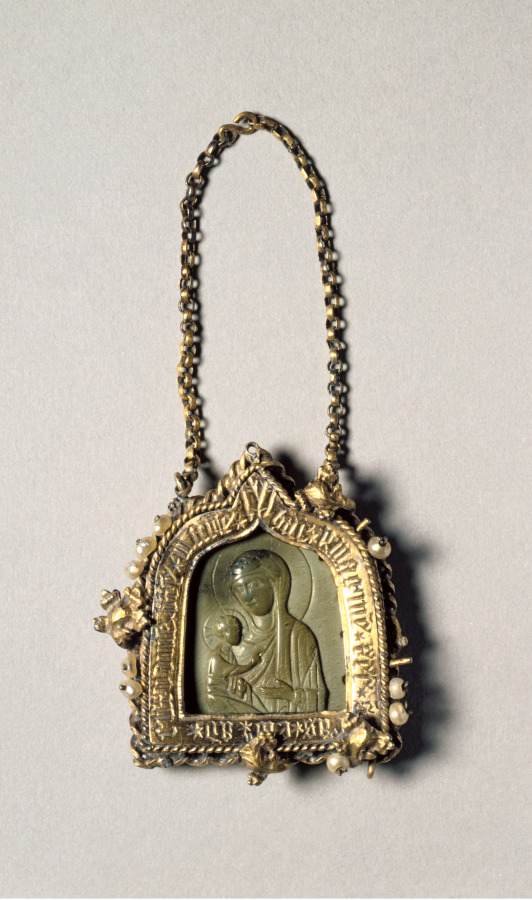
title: Pendant Icon with the Virgin "Dexiokratousa" and Frame with Winged Bull of Saint Luke on the back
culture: Byzantium (pendant); Germany, Aachen (frame), Byzantine period, 12th century (pendant); Byzantine period, 14th century (frame)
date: pendant 1100s; frame mid-1300s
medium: steatite, gilt silver, pearls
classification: Glyptic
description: This small-scale Byzantine icon depicts a half-length figure of the Virgin holding the Christ child. When the icon was mounted in its present frame by a German artist in the 14th century, it was considered to be an authentic portrait painted by Saint Luke. This claim, made in an inscription on the frame, is further emphasized by the ox, Saint Luke’s symbol, engraved on the frame’s reverse.